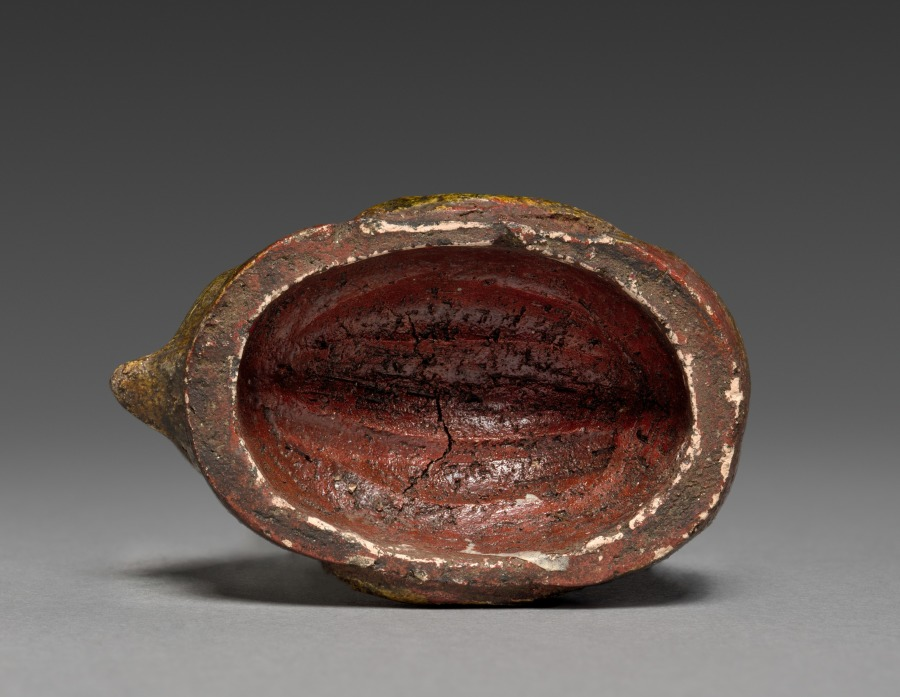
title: Lid of Incense Container (Kōgō) in the Shape of a Bird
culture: Japan, Edo period (1615–1868)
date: c. 1700–1868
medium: pottery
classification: Ceramic